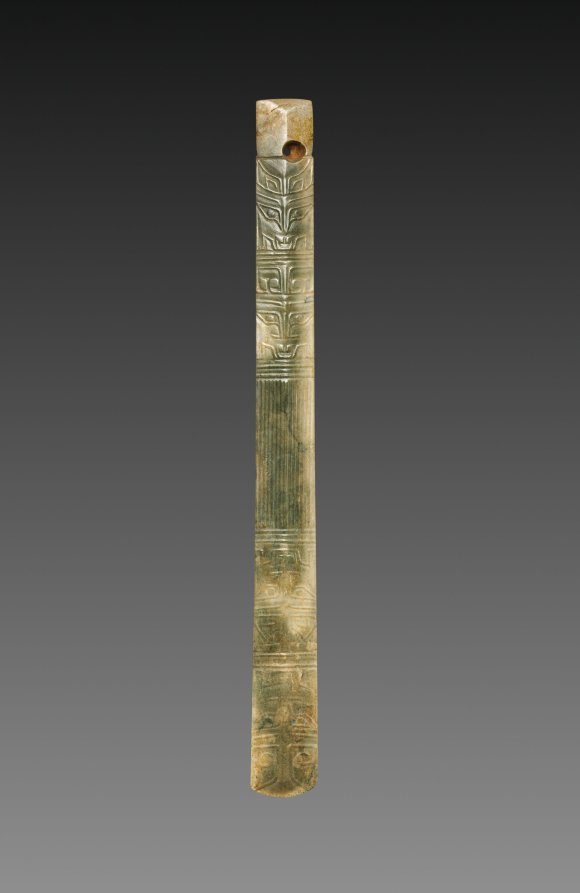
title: Ceremonial Scepter with Animal Masks (Gui)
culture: China, Shang dynasty (c. 1600–c. 1046 BCE)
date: c. 1600–1050 BCE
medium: jade (nephrite)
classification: Jade